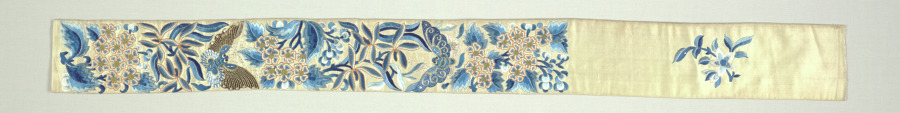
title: Sleeve Band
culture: China, Qing dynasty (1644-1911)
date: 1800s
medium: Silk, satin weave, embroidery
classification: Garment